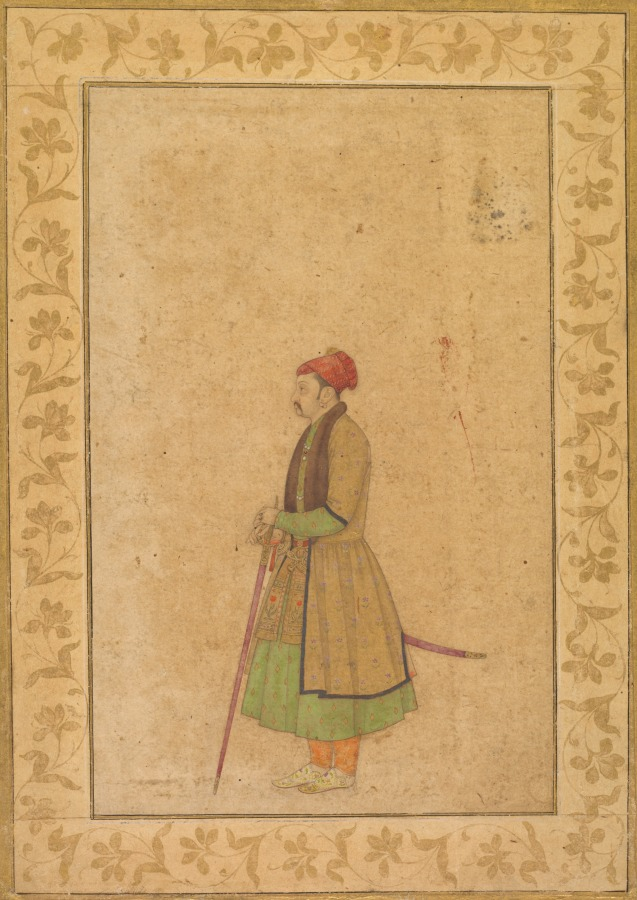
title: Portrait of Raja Ram Singh of Amber (r. 1667-1688) with a Deccan Sword (recto)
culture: India, Mughal, 17th century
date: c. 1680–85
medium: Gum tempera and gold on paper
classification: Painting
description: The sensitive, naturalistic rendering of weariness and forbearance in the face belies the trappings of favor bestowed on Ram Singh by the Mughal emperors Shah Jahan and Alamgir, whom he served as courtier and general between 1643 and 1688. He was a Hindu ruler from the kingdom of Amber in Rajasthan, under the control of the Mughal empire. Spending most of his life at the imperial court or leading military expeditions for the Mughals, this portrait was included in a Mughal album and inscribed with an Urdu verse indicating his value to the empire: "wherever he has led an expedition, victory is his." He wears a sumptuous coat of honor with a fur collar, woven with gold threads and floral sprigs and costly rubies, emeralds, and pearls. The straight sword with enameled hilt may be the one gifted to him by the emperor upon his succession to the throne as king of Amber in 1667. His long history of service at the imperial court, however, was checkered with troubles, including his allegiances with failed successors of Shah Jahan and the escape of the rebel Shivaji under his watch.